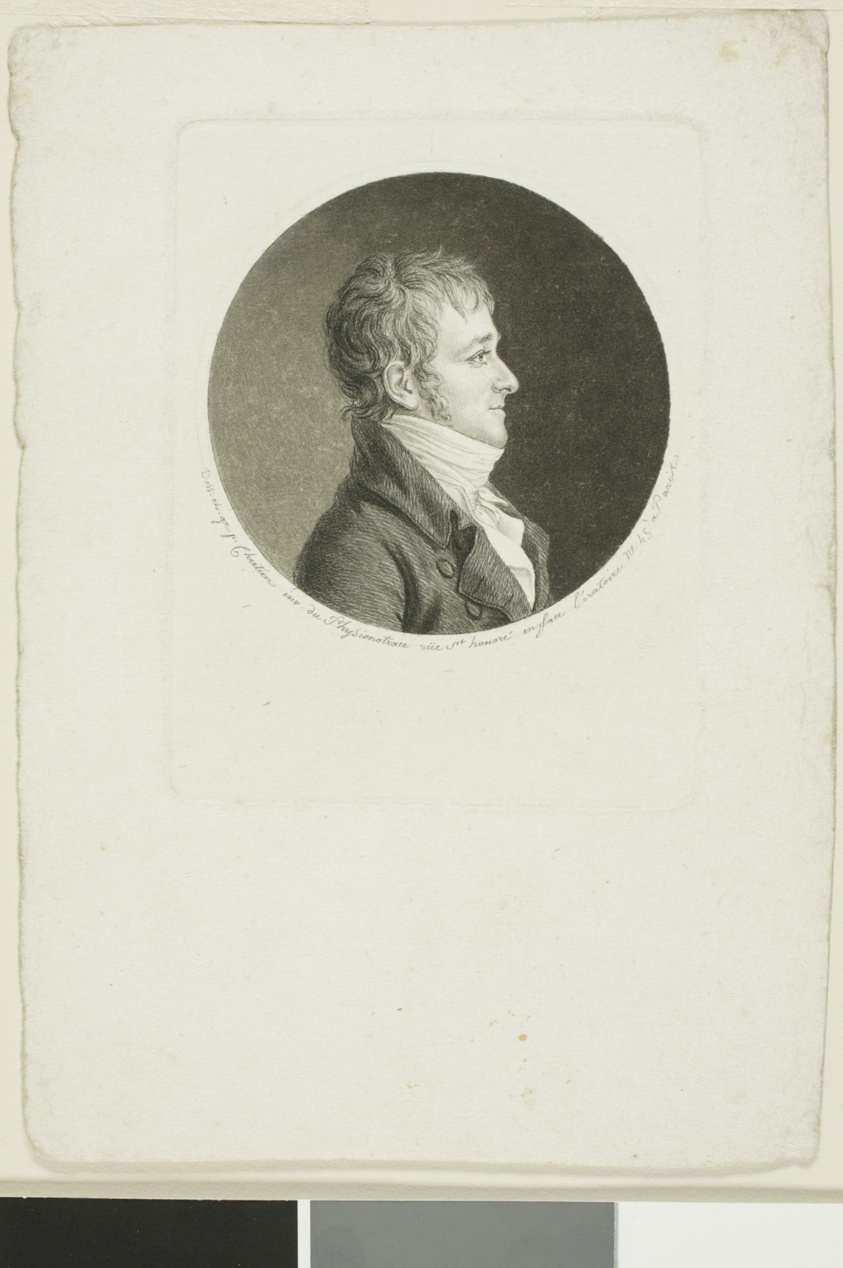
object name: Print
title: Portrait of a Man with Brown Hair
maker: Giles Louis Chrétien; French, 1754-1811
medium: Etching with roulette and aquatint, over physionotrace, on ivory wove paper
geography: France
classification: etching; print; prints and drawing